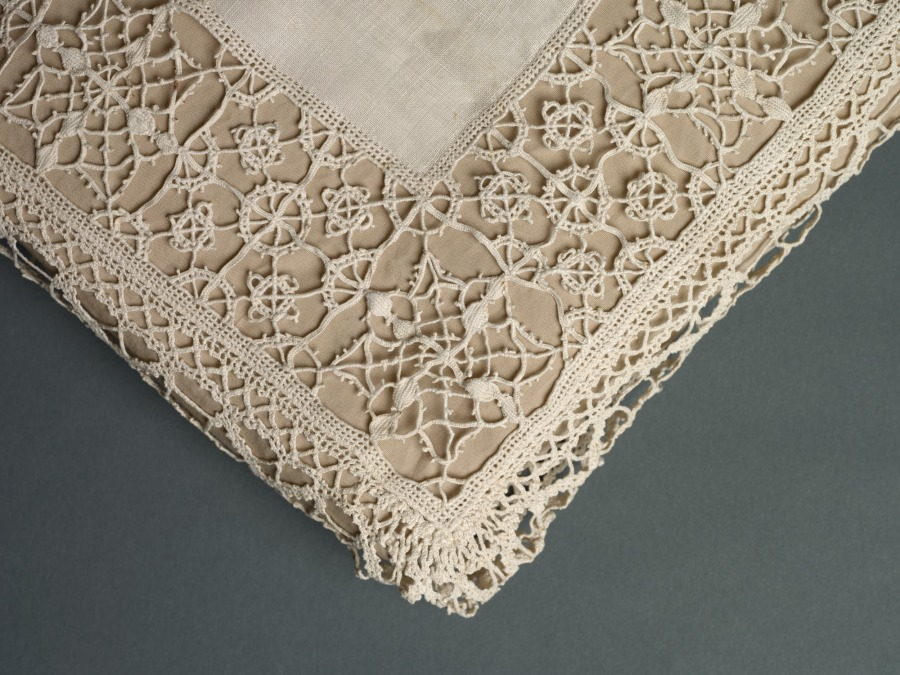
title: Lace Pillow Cover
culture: Italy, Venice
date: 1600s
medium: Plain weave linen (center): plaited bobbin lace edging that mimics needle lace (reticella)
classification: Lace